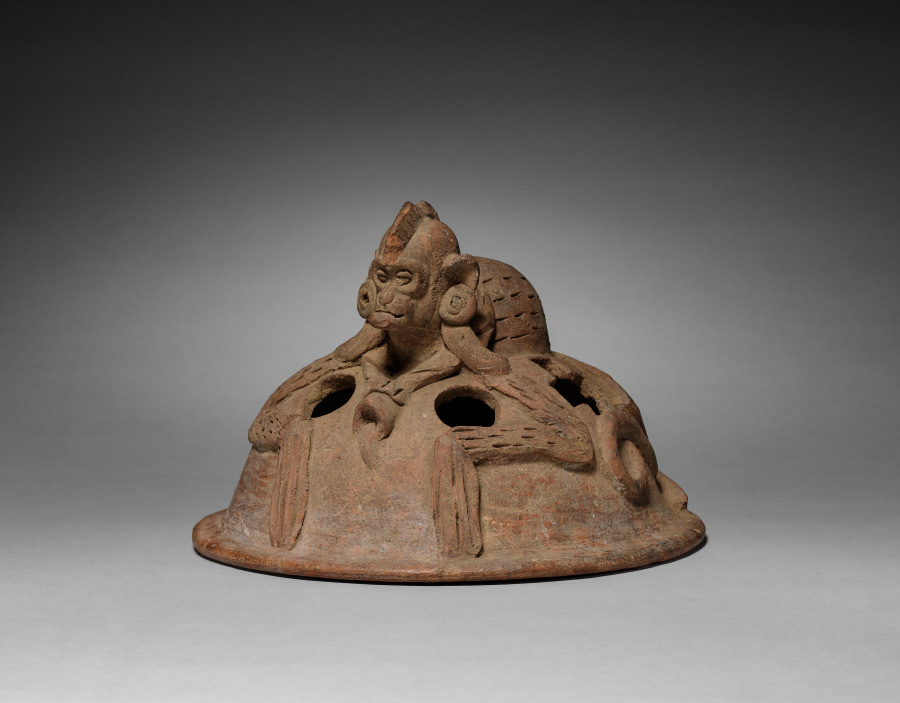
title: Incense Burner (lid)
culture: Guatemala, Quiché, San Juan Cotzal, Maya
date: 600–1000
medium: pottery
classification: Ceramic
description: According to the Popol Vuh, a sixteenth-century Quiché Maya manuscript, the world has been created and destroyed twice, and we now live in the third creation. In the second creation, human beings were made from wood and reeds. They lacked souls and minds, and they did not revere their creator. Because of these imperfections, most were killed by an uprising of utensils and domestic animals. Monkeys are the descendents of the survivors.